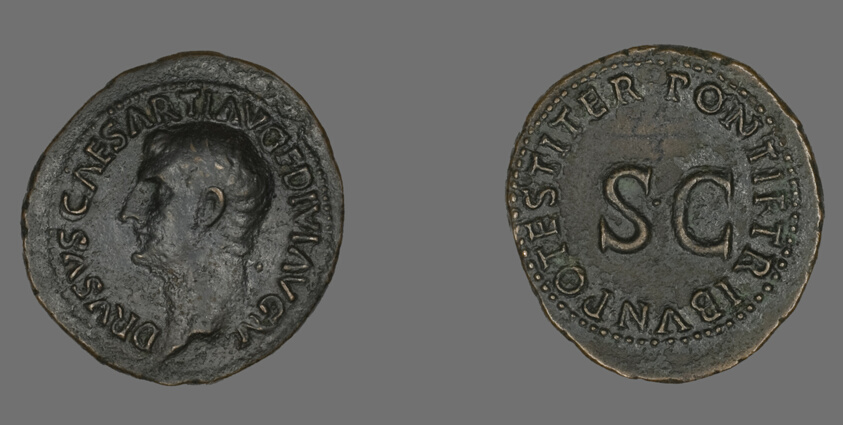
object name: Coin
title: As (Coin) Portraying Emperor Drusus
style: roman (ancient, style or period)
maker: Roman, minted in Rome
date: 22-23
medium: Bronze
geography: Roman Empire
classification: coin; ancient art